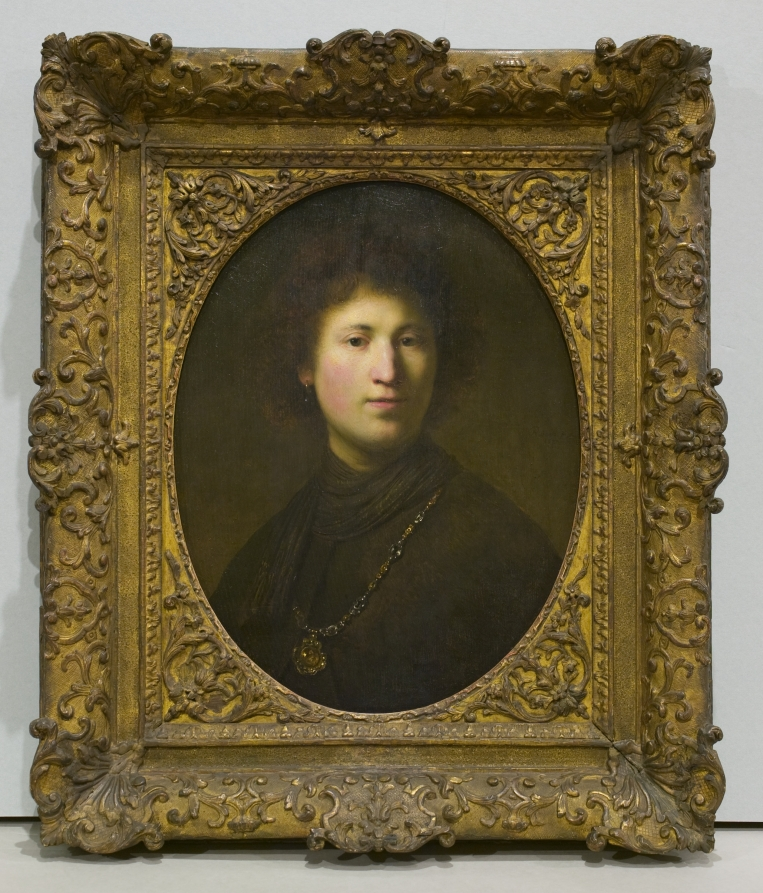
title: A Young Man with a Chain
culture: Netherlands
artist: Rembrandt van Rijn (Dutch, 1606–1669)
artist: and Studio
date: c. 1629 or 1632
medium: oil on wood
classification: Painting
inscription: Signed at right: "RHL van Rijn / 1632 [RHL in monogram]"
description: This painting is an example of a tronie, a Dutch word meaning “head” or “facial expression.” Tronies were not intended to be identifiable portraits, but artistic investigations of facial appearance and fanciful costume. Particularly in the years around 1630, Rembrandt used this popular format to explore different lighting effects and facial expressions. Here, the strong contrast of light and shade shapes the contours of the young man’s face; unusual accessories such as the striped scarf and glittering pendant on a jeweled chain add an exotic touch. Although this painting bears Rembrandt’s monogram, the authorship is not certain. Some scholars have attributed it to Isaac de Joudreville (1613–1648), a pupil and associate of Rembrandt who painted comparable tronies in a similarly smooth and elegant style.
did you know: Once identified as Rembrandt himself, the sitter is now considered an anonymous study of human character.